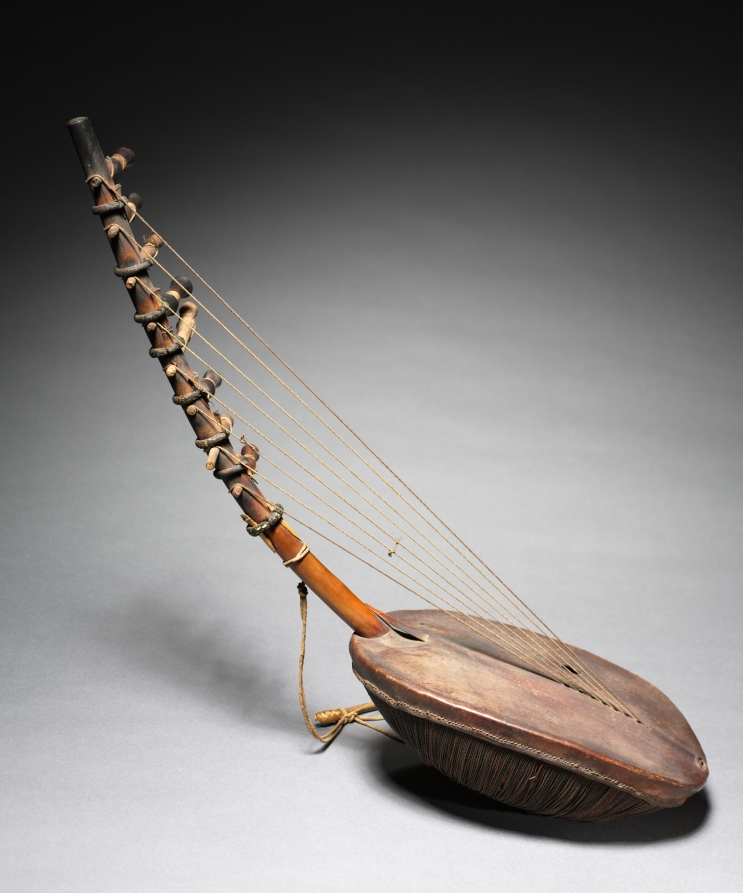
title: Musical Instrument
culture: East Africa, Uganda, 20th century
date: 1900s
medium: wood and leather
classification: Musical Instrument